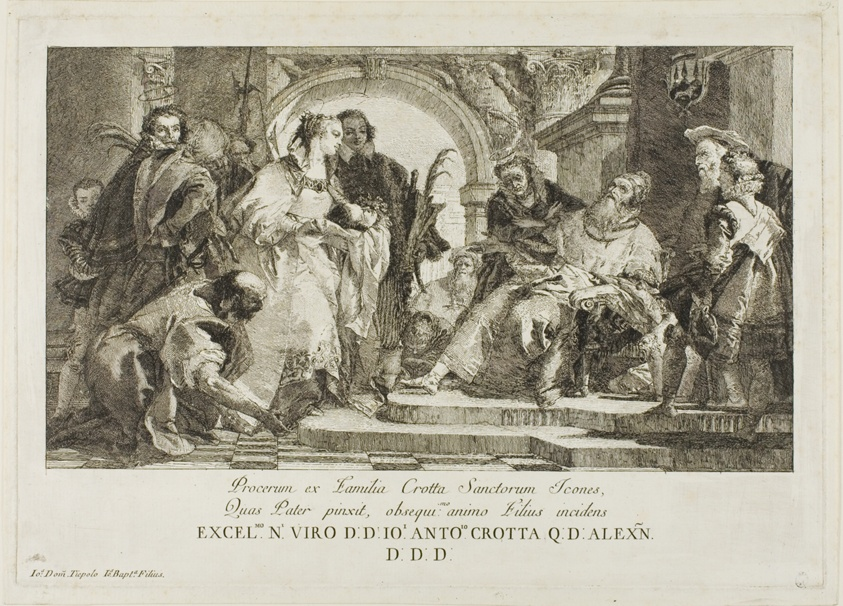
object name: Print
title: The Patron Saints of the Crotta Family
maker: Giovanni Domenico Tiepolo (Italian, 1727-1804); after Giambattista Tiepolo (Italian, 1696-1770)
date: after 1750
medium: Etching on paper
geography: Italy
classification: etching; print; prints and drawing